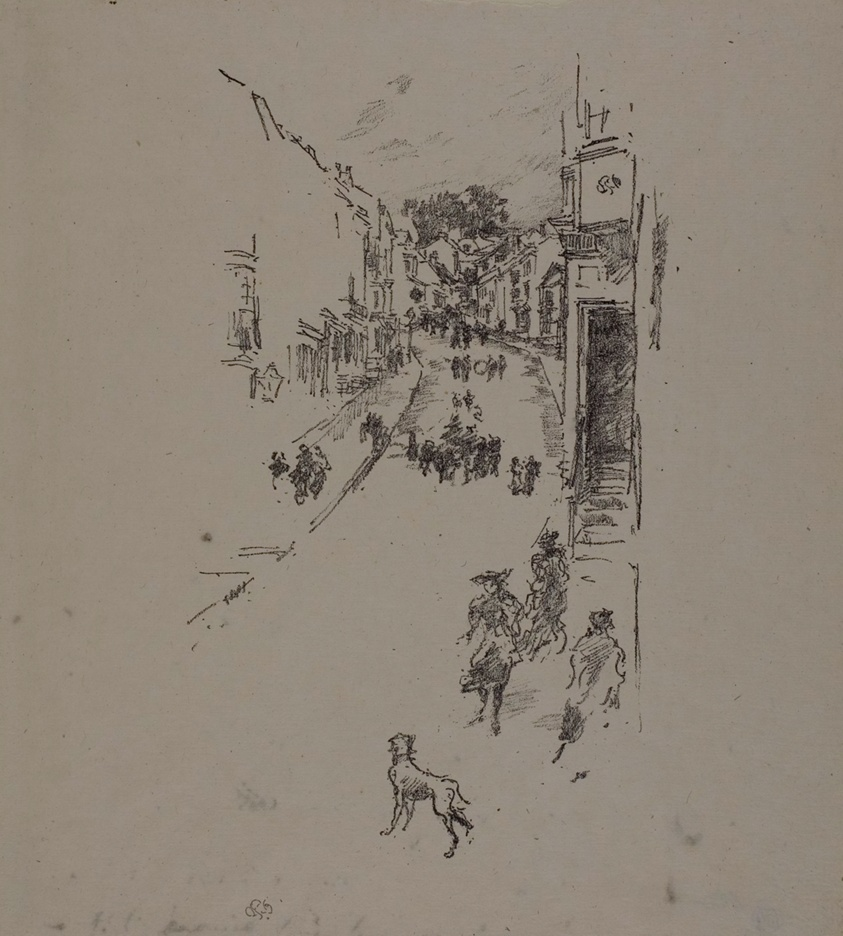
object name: Print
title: Sunday, Lyme Regis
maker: James McNeill Whistler (American, 1834-1903)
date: 1895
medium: Transfer lithograph in black on cream wove paper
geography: United States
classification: transfer lithograph; lithograph; print; prints and drawing; paper